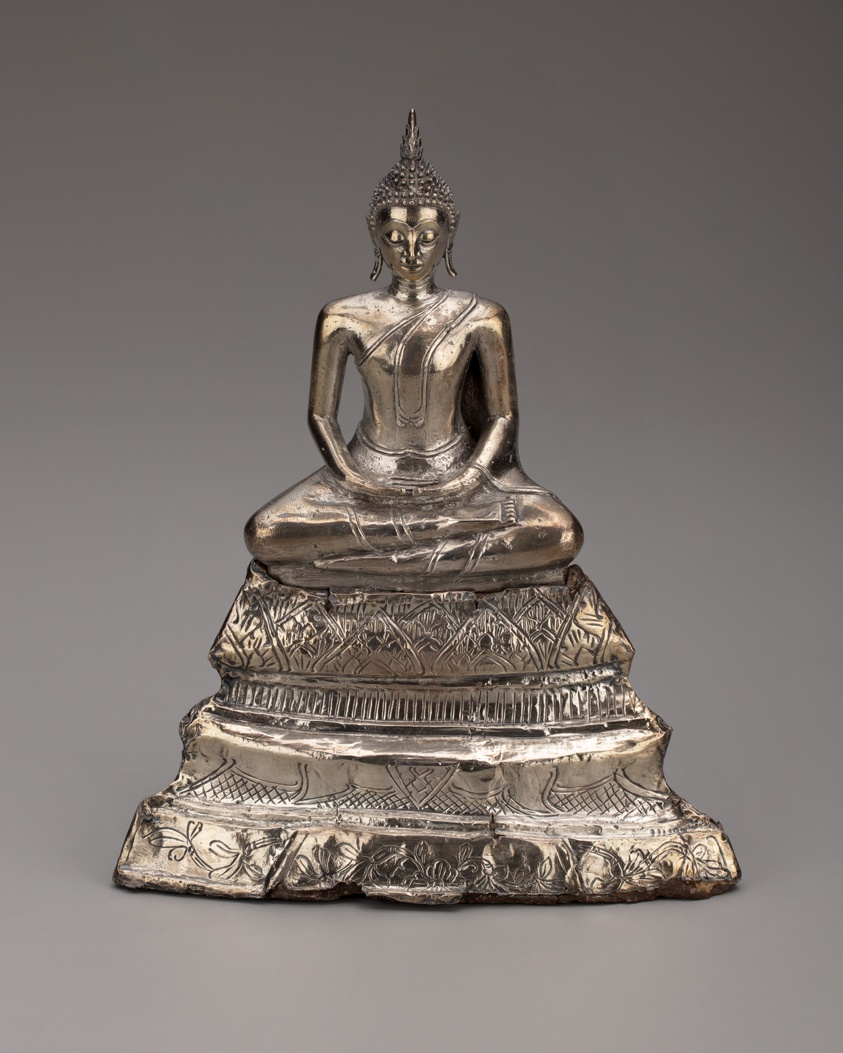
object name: Sculpture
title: Buddha Seated in Meditation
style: Southeast Asian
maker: Thailand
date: 19th century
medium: SIlver, cast with base worked in repoussé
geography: Thailand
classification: silver; metal; sculpture; asian art